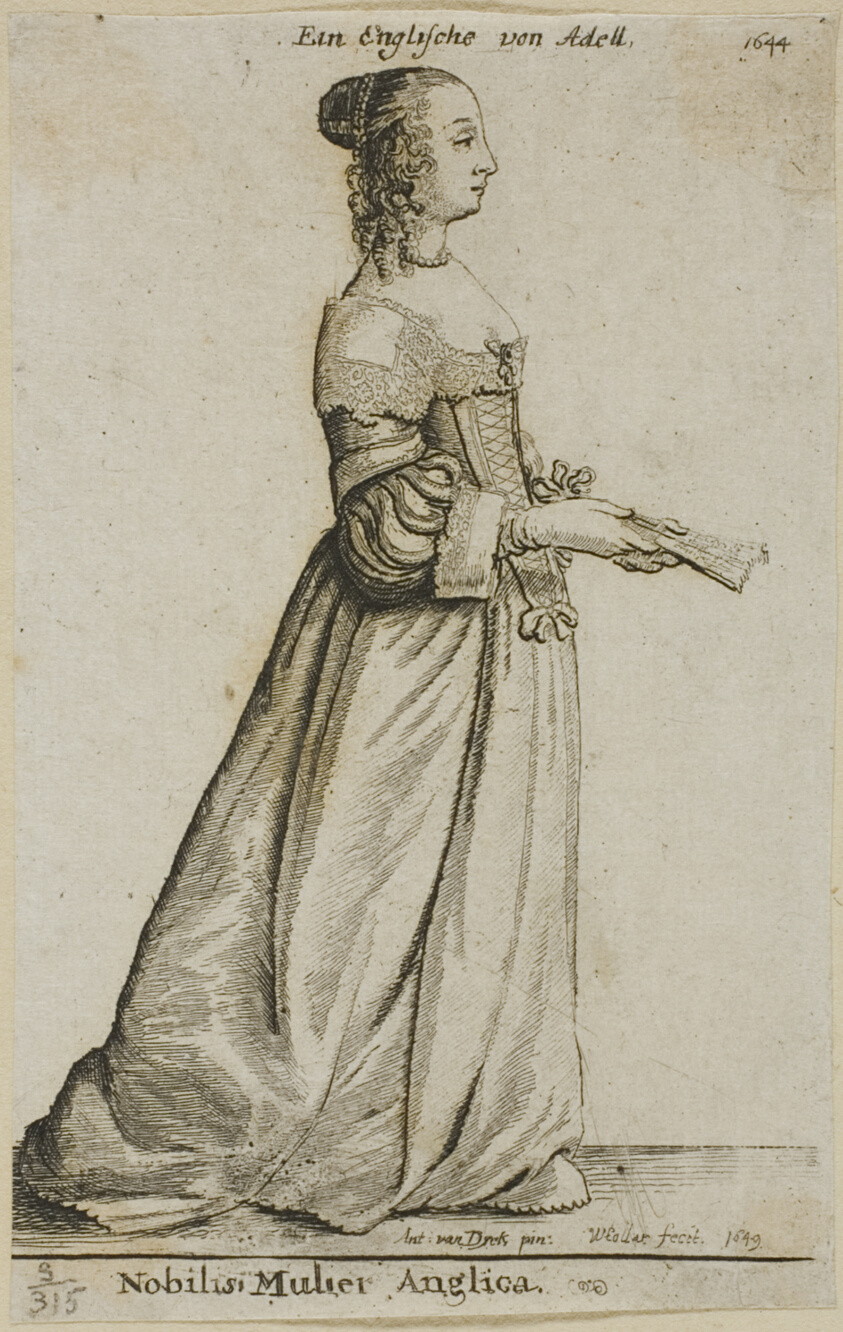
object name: Print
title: English Noblewoman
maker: Wenceslaus Hollar (Bohemian, 1607-1677); after Anthony van Dyck (Flemish, 1599-1641)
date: 1649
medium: Etching on gray Asian paper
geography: Bohemia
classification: etching; print; prints and drawing